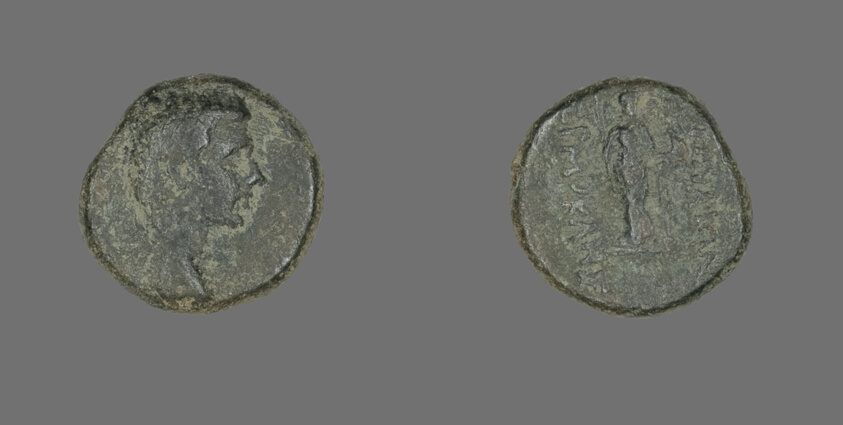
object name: Coin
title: Coin Portraying Emperor Augustus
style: imperial (roman)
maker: Roman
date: 27 BCE-14 CE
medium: Bronze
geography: Roman Empire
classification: coin; ancient art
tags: Headrest